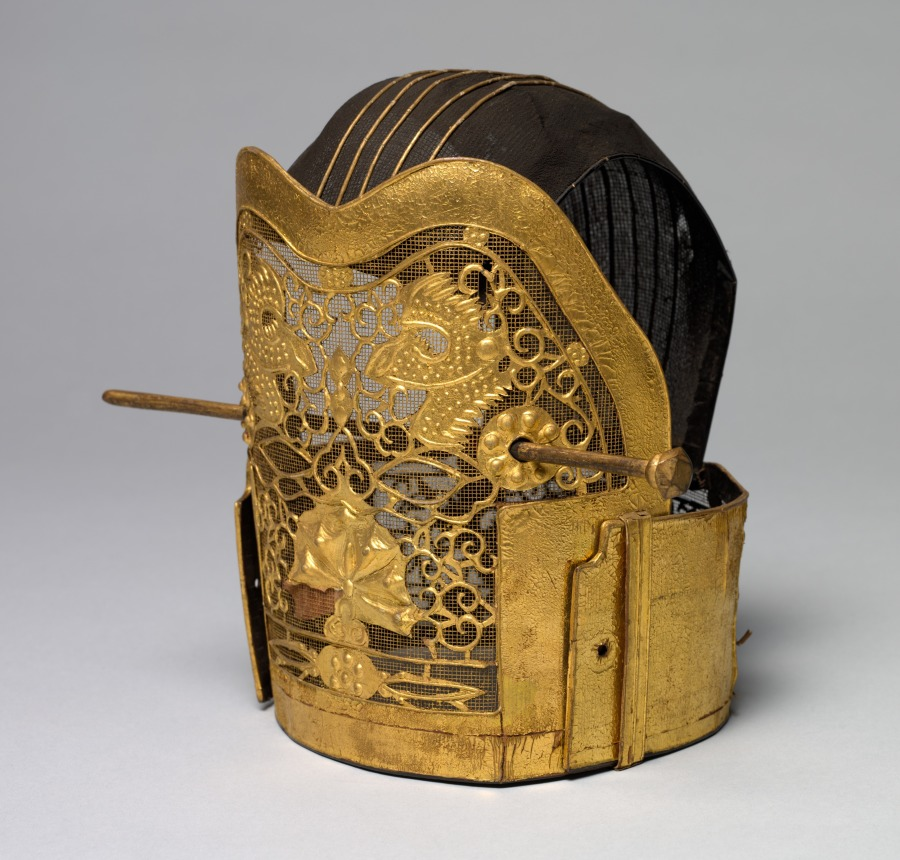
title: Crown for the Royal Ceremonial Costume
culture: Korea, Joseon dynasty (1392–1910)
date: late 1800s–early 1900s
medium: gilded paper, metal wire, and black silk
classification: Garment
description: This is a set of royal ceremonial robe and accessories worn by a high-ranking court official for attending special state ceremonies. The set consists of an inner coat, an outer coat, a skirt, a back apron, a crown, a pair of jade tassels, a tablet, and a belt.